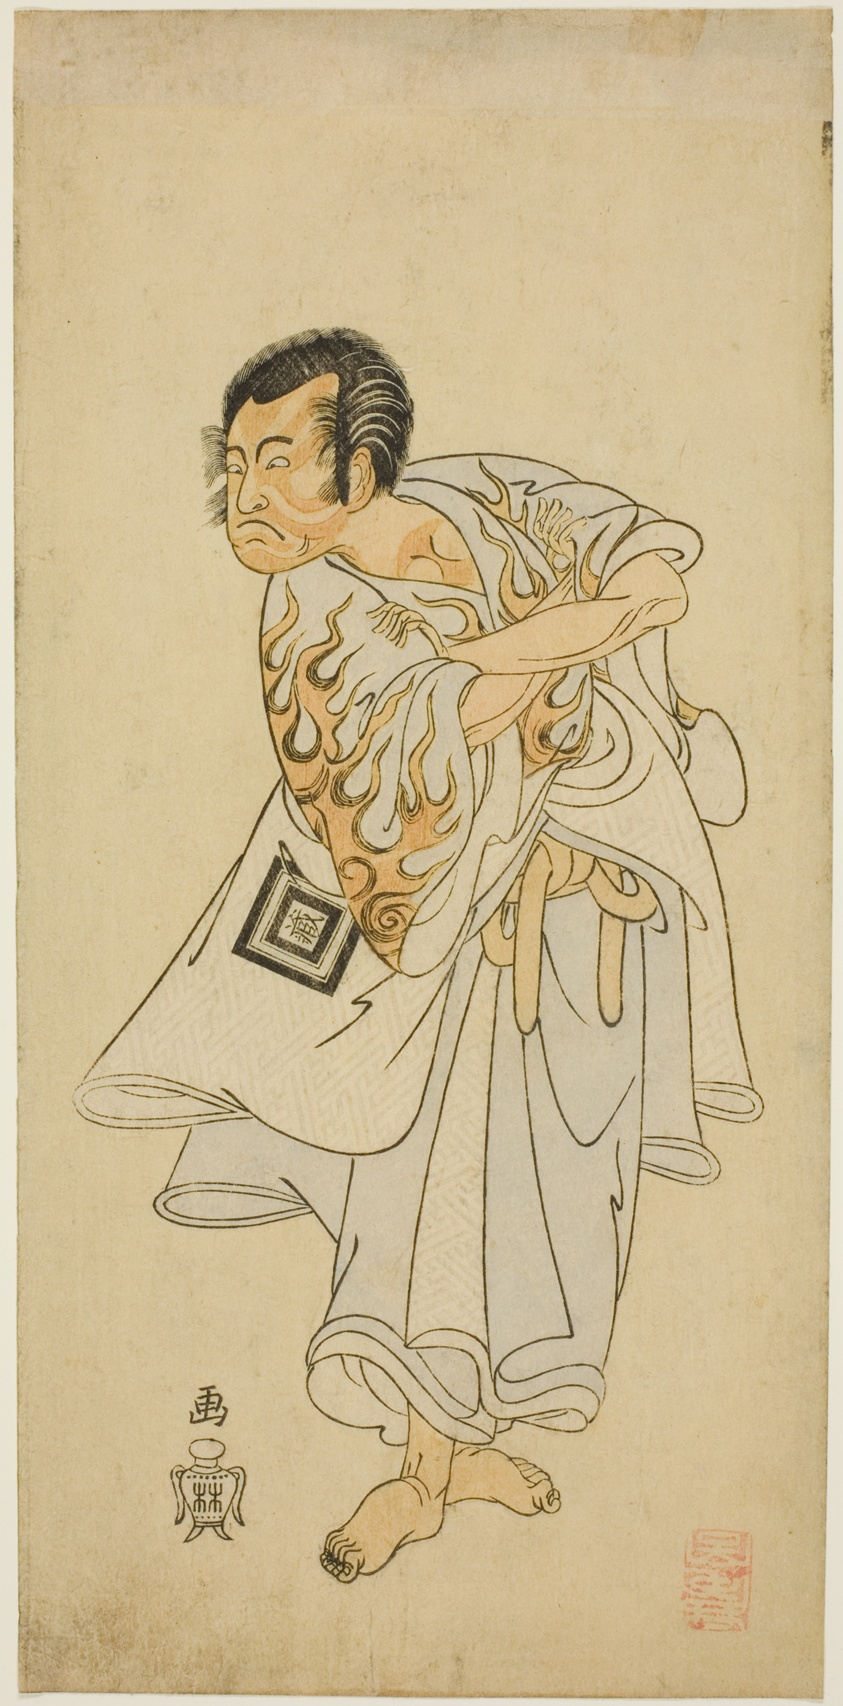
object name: Print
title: Actor Ichikawa Danzô III as Narukami in “Bird of the Capital: Komachi of the East” (“Miyakodori azuma Komachi”)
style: Japanese (culture or style)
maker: Katsukawa Shunshô 勝川 春章; Japanese, 1726-1792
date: About 1768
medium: Color woodblock print; hosoban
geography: Japan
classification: woodblock print; print; asian art